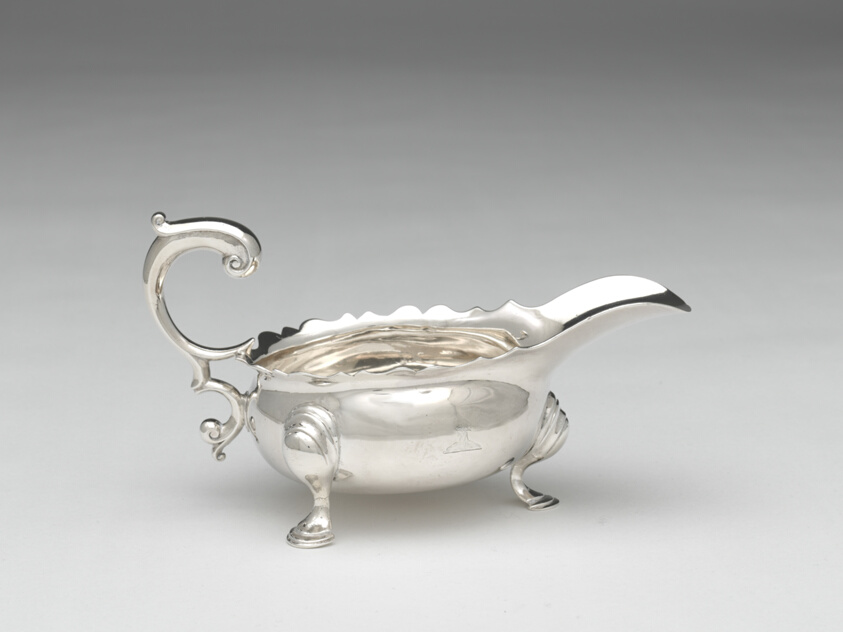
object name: Metalwork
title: Sauce Boat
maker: Jacob Hurd; American, 1702/03–1758; Boston, Masssachusetts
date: c. 1745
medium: Silver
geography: Boston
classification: vessel for serving food; sauceboat; silver; american decorative arts; american arts; decorative arts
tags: dining, drinking